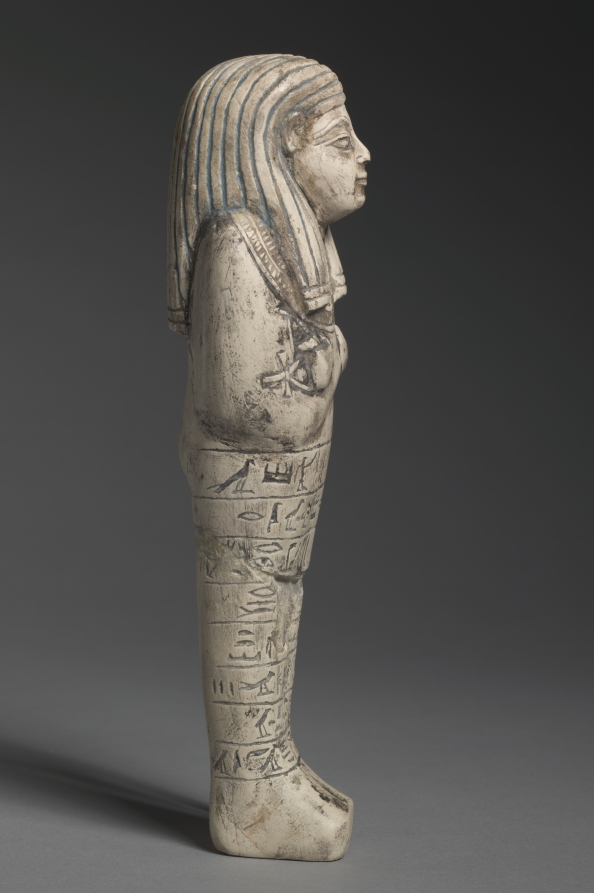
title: Shawabty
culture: Egypt, New Kingdom (1540–1069 BCE)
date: 1336–1295 BCE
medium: painted limestone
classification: Funerary Equipment